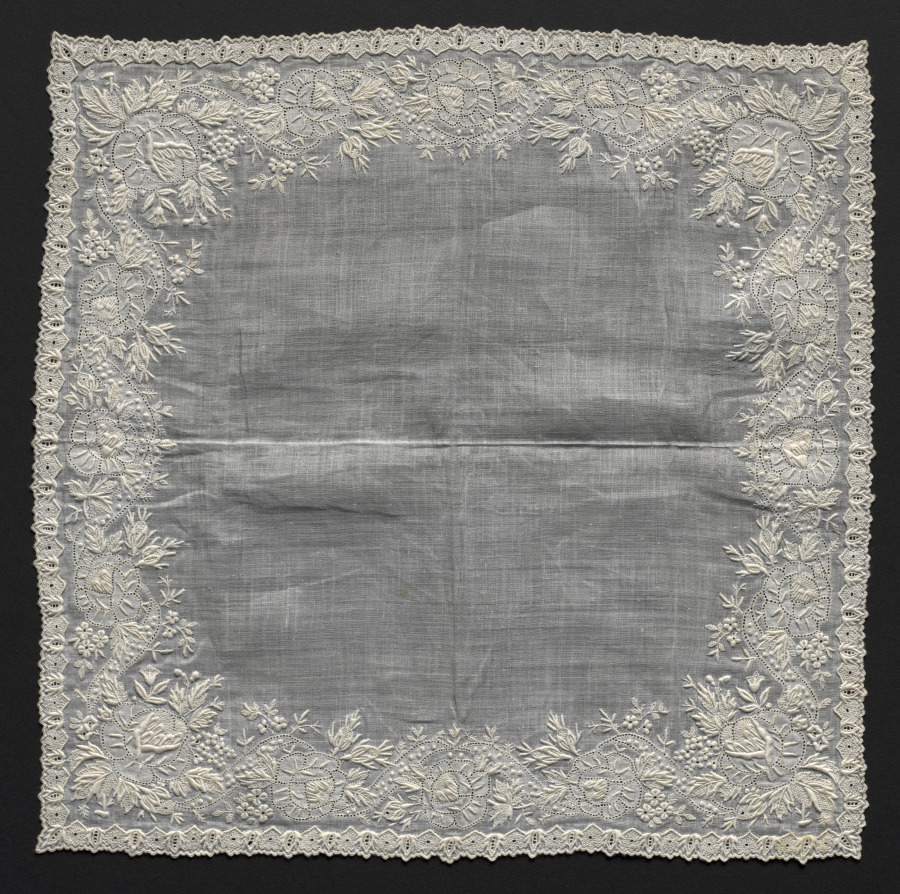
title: Handkerchief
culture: Flanders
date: 1800s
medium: Plain weave linen: embroidered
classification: Embroidery